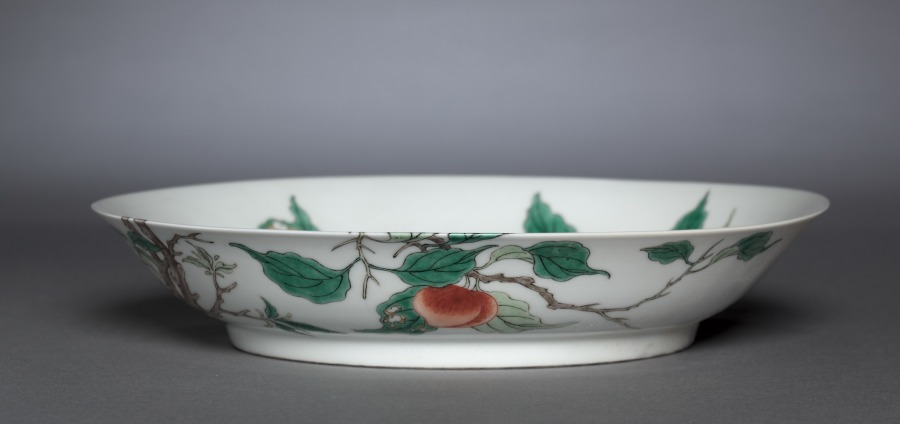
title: Dish with Bird on Fruit Tree Branch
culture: China, Jiangxi province, Jingdezhen kilns, Qing dynasty (1644–1911), Kangxi mark and reign (1662–1722)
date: 1662–1722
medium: Porcelain with famille-verte overglaze enamel decoration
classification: Ceramic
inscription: 大清康熙年制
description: A green-winged, red-billed bird perches on a fruit tree branch. The dish is painted in bright enamels and fine outlines to create vibrant tones and delicate textures, especially visible in the bird’s feathers. The plant motif extends beyond the rim in what is known as an “over-the-wall” composition. While decorative, the composition and color scheme remain stylized rather than naturalistic. The existence of several Kangxi period dishes with an almost identical design suggests that the composition followed standardized templates, likely intended for festive occasions or as a gift.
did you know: This dish is related to the set created for the Kangxi emperor's 60th birthday.